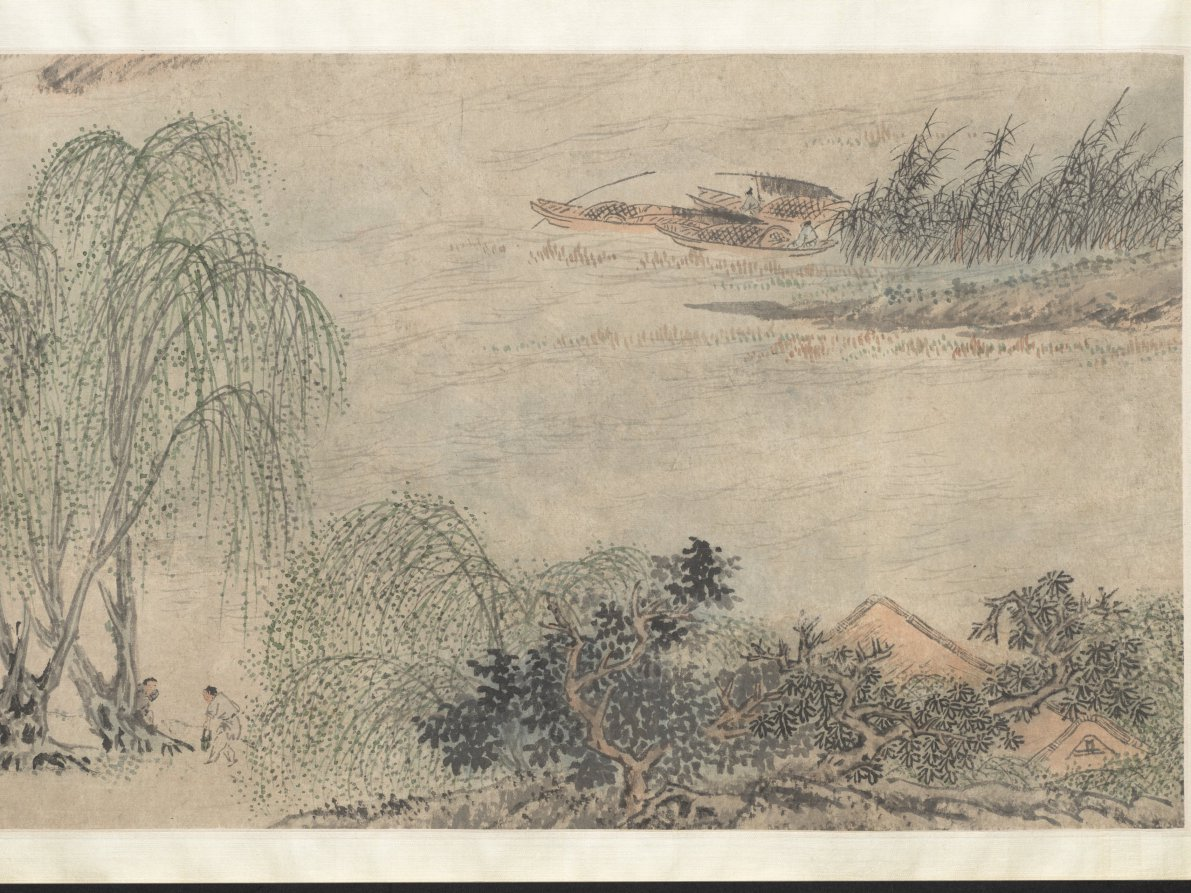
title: Fisherman's Joy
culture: China, Ming dynasty (1368–1644)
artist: Qian Gu (Chinese, 1508–c. 1578)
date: 1572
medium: Handscroll; ink and light color on paper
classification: Painting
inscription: Artist's inscription, signature, and seal: On the autumn day of the jen-shen year [1572], P'eng-ch'eng, Ch'ien Ku painted [this]. [seal] Hsüan-ch'ing shih. 2 colophons, both dated 1689, and 5 additional seals of Yün Shou-p'ing (1633-1690).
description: This painting has a scene showing two small crafts, each manned by two fishermen, practicing a traditional fishing method. In one of them, a man uses a bamboo pole to direct the movements of a cormorant bird sent into the water. Cormorant fishing, witnessed in some areas of the lower Yangzi River, appears in Zhe school paintings. Qian Gu may have borrowed these narrative figure scenes from Zhe school paintings, while his vantage point, brushwork, and soft tones align with the Wu school style. Scenes of fishermen appealed to urban and educated audiences who idealized the self-sufficient independence of fisherfolk.